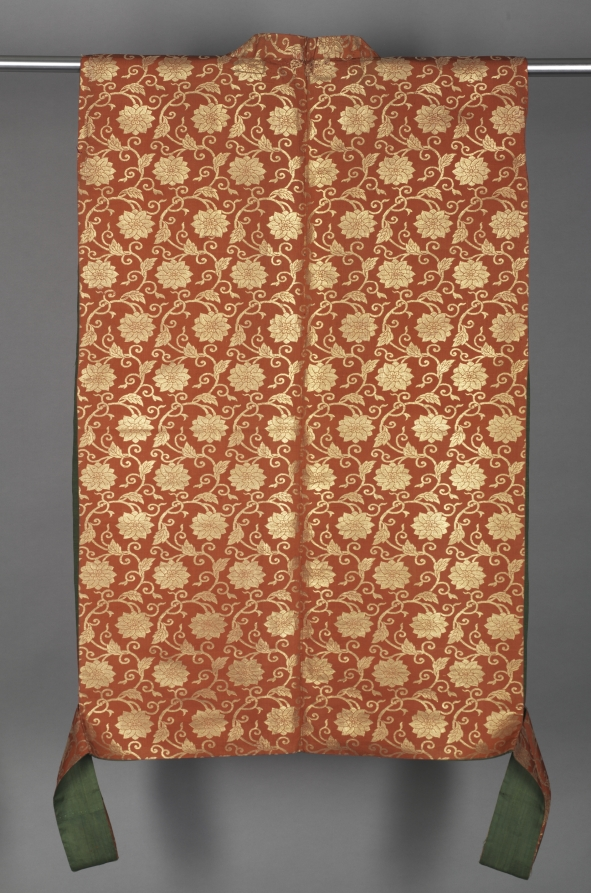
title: Noh Costume (Sobatsugi) with Peonies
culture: Japan, Edo period (1615–1868)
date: 1800–1850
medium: brocade; silk and metal thread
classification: Garment